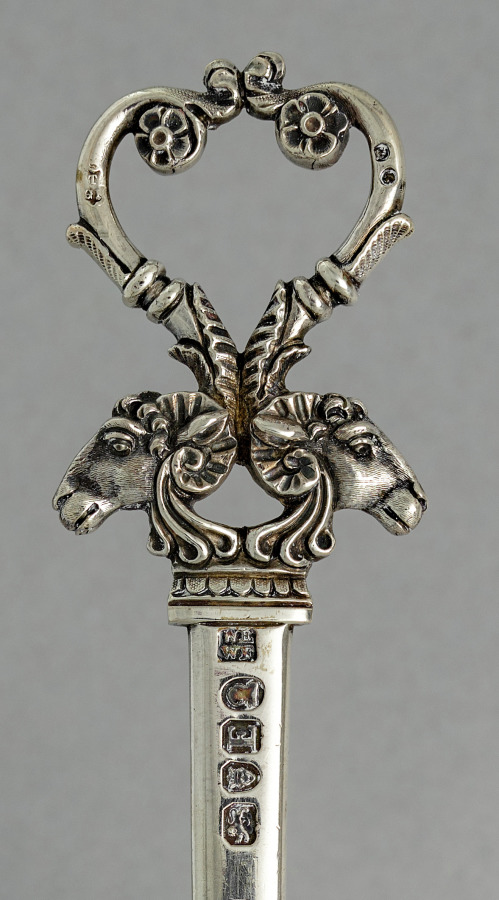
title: Skewer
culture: England, London, late 18th-early 19th Century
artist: firm of William Eley (British)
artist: firm of William Fearn (British)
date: 1800–1801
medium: silver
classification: Silver